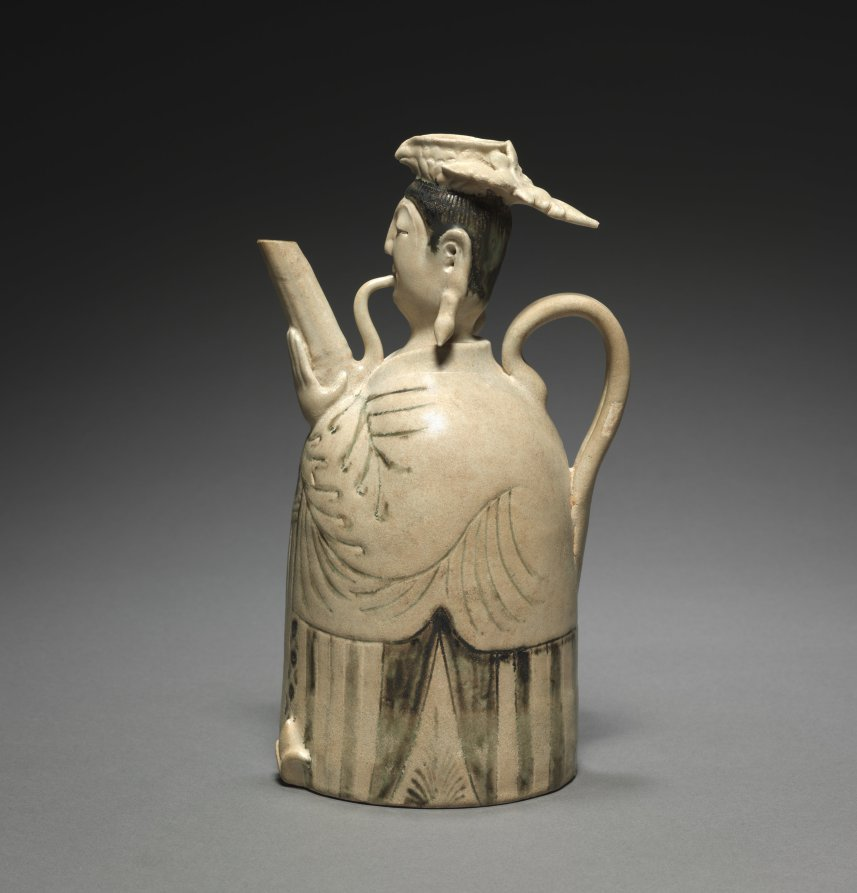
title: Ewer in the form of a Sheng Player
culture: China, Liao dynasty (916-1125)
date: 1000s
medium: glazed, buff stoneware with underglaze slip coating and painting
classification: Ceramic